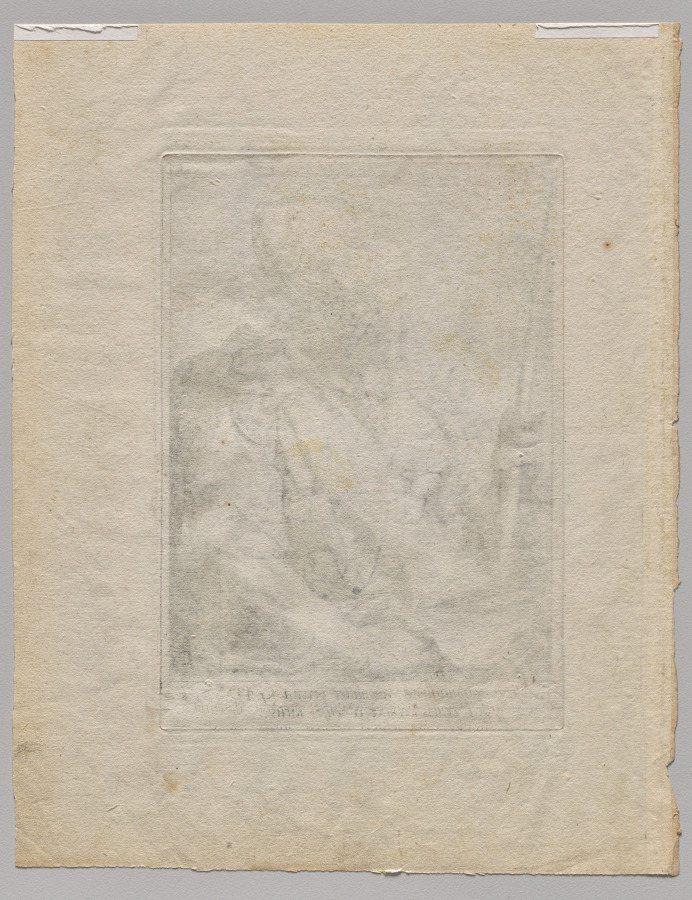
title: Plate 8: Gad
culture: Netherlands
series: The Twelve Sons of Jacob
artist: Jacob de Gheyn II (Netherlandish, 1565–1629)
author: after Karel I van Mander (Netherlandish, 1548–1606)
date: c. 1589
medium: engraving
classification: Print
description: In this print, the biblical figure Gad holds a spear and wears a suit of armor while a militia gathers behind him, denoting his preparedness for battle. This is one of a series of prints depicting the twelve sons of Jacob, each with an attribute and costume that denotes his character. According to the Old Testament, Jacob blessed each of his twelve sons, prophesizing the destiny of their tribe, and assigning them a parcel of land in Canaan. The print series was made in the Netherlands in the late 16th century, a time of political struggle when Old Testament heroes were popular exemplars of fortitude and patience.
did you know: The upright, profile view of this Old Testament figure dressed in armor helps to characterize his military pursuits as noble in nature.